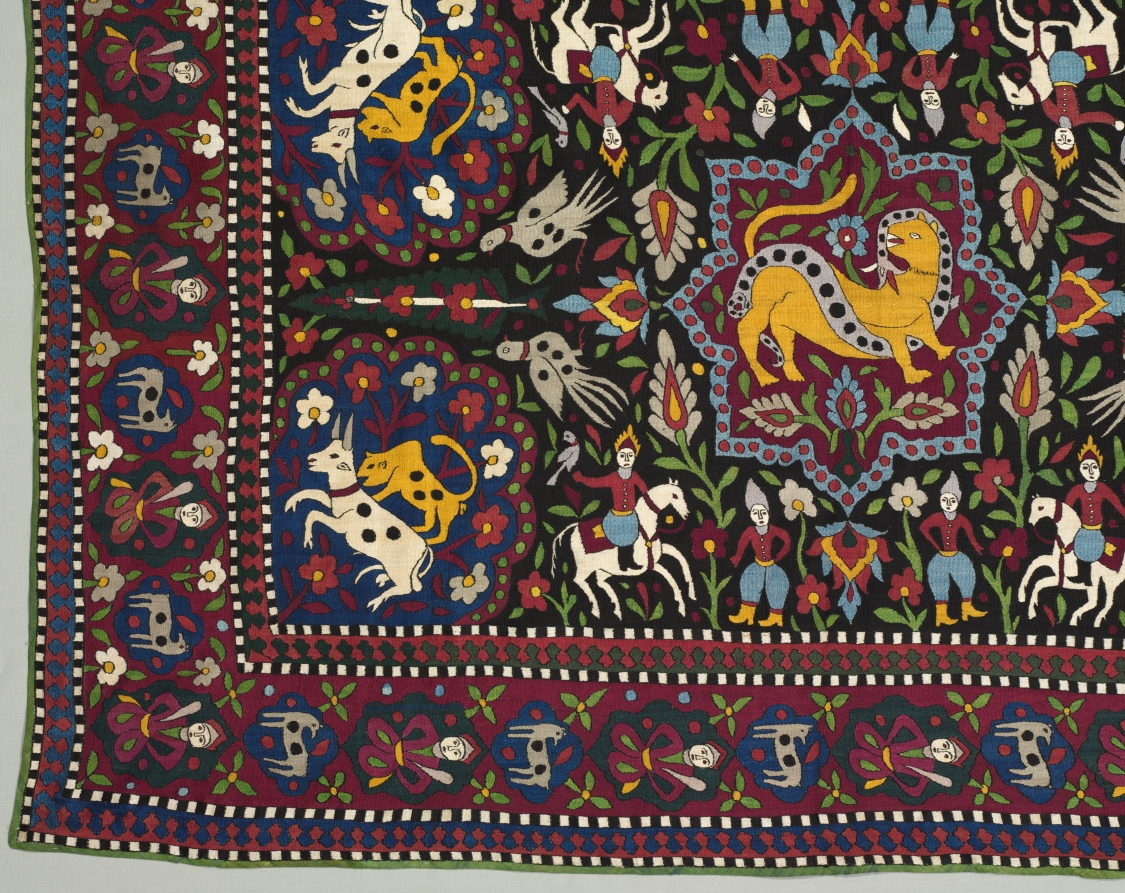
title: Ceremonial or summer floor cover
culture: Iran, Qajar period (1779-1925)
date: 1800s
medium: cotton: plain weave; silk: embroidery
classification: Embroidery